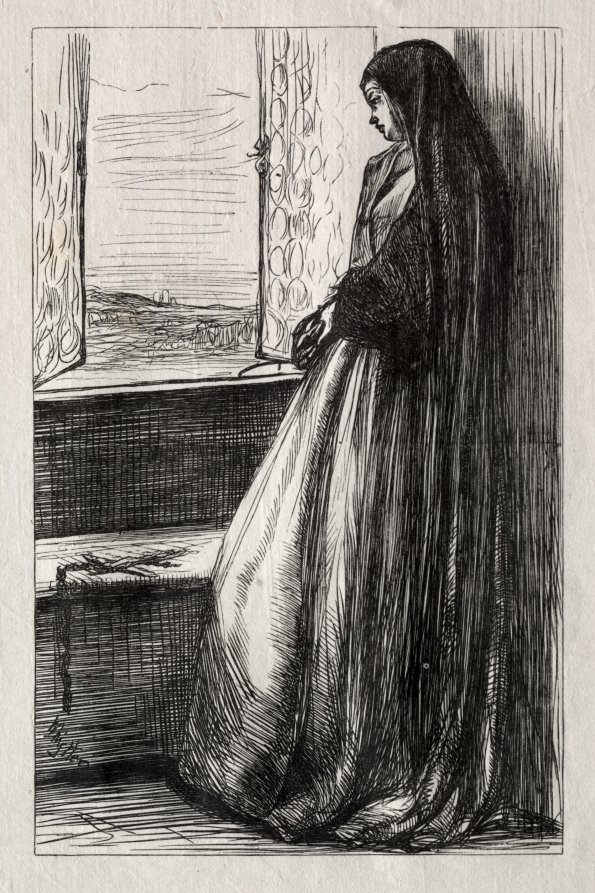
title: Illustration for "Count Bruckhardt" in "Once a Week"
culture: America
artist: James McNeill Whistler (American, 1834–1903)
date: 1862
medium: wood engraving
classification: Print